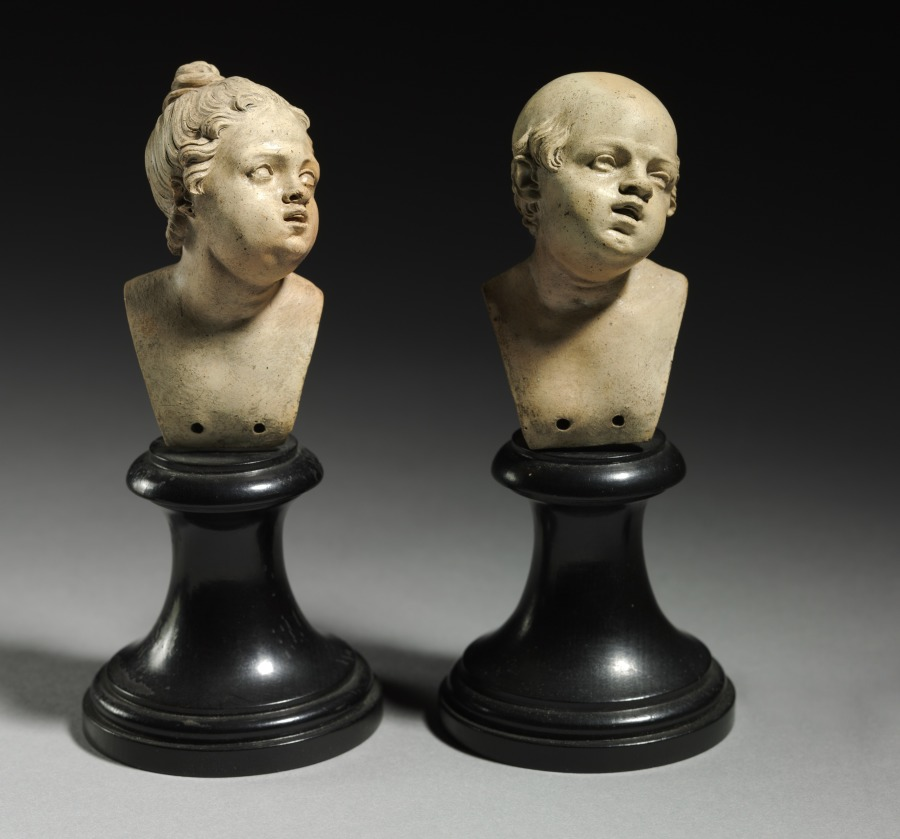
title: Bust Pair: Head of a Man and Head of a Woman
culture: Italy, Naples(?), early 19th Century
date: c. 1800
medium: terracotta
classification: Sculpture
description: Each of these miniscule terracotta busts has allegedly been formed by hand, though the precision of the detailed features implies that they have been cast from a mold. Details such as the meticulously executed facial features and the thin, exact rows of hair on each figure suggest a manufactured method of creation. Furthermore, these figures lack any trace of fingerprints that handmade figures of this time typically bear. Small holes at the base of each bust suggest that the heads were once attached to bodies that may have been used as crèche figurines. The busts were created in Naples where large numbers of nativity scenes were produced around the turn of the nineteenth century. The similarity in size to archetypal terracotta crèche figurines as well as the vast production of nativities in Naples at this time suggest that these busts were created for a nativity scene.